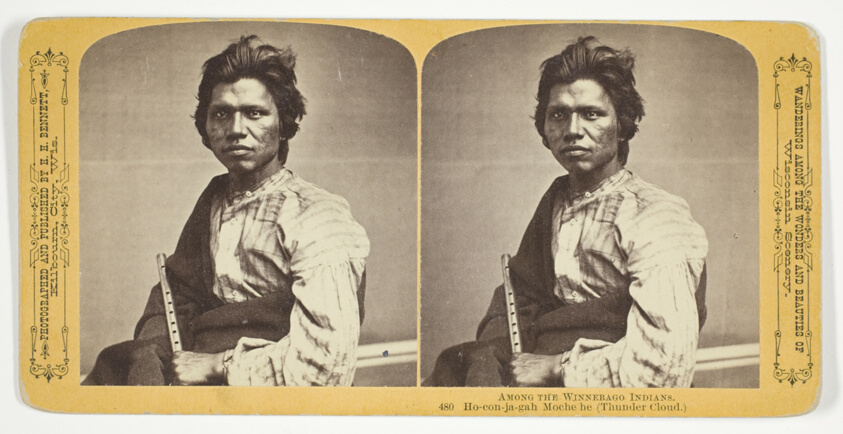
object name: Photograph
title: Ho-con-ja-gab Moche he (Thunder Cloud.), No. 480 from the series "Among the Winnebago Indians"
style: 19th century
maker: Henry Hamilton Bennett (American, born Canada, 1843-1908)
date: 1870/1908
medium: Albumen print, stereo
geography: Wisconsin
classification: photography; photograph; albumen silver print; stereograph (albumen)